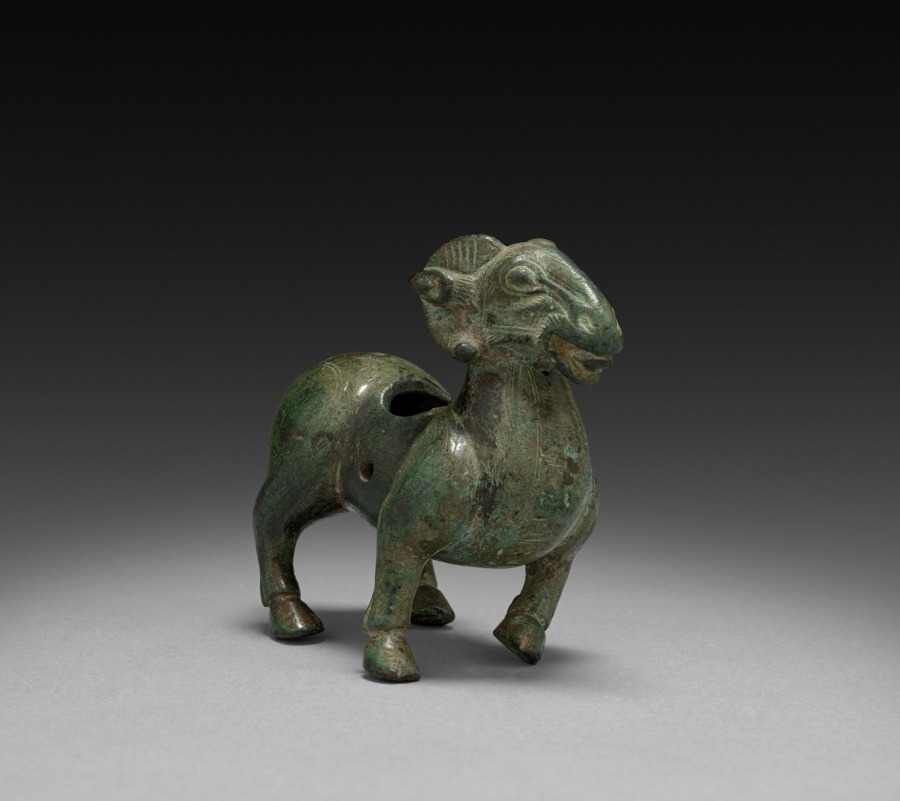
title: Zun in the Shape of a Ram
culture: China, Han dynasty (202 BCE–220 CE) to Six Dynasties (265–587 CE)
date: 206 BCE–220 CE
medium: bronze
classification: Sculpture